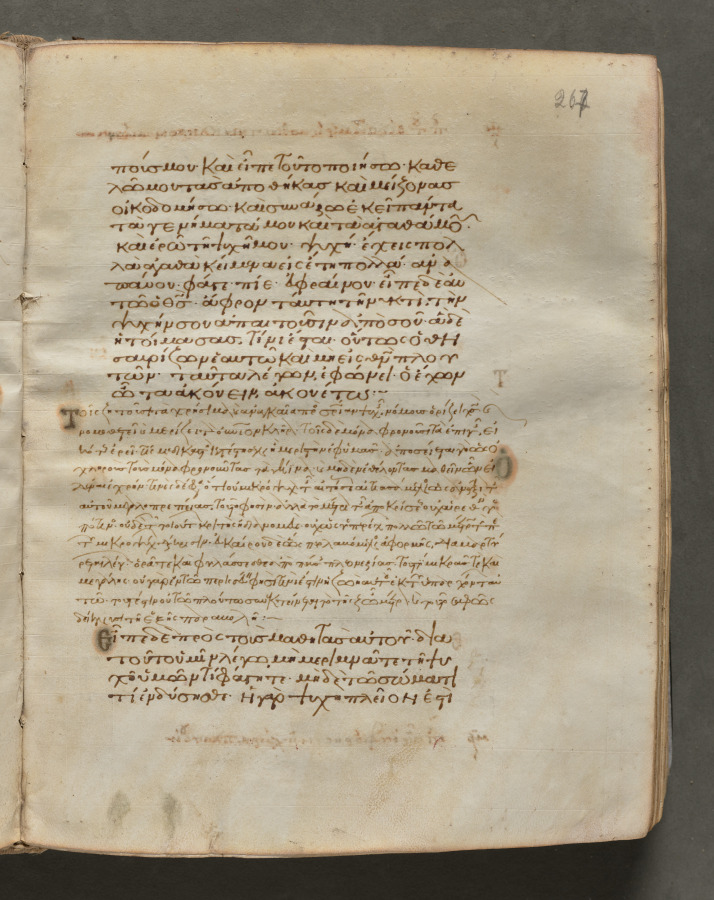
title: Text, folio 267 (recto), from a Gospel Book with Commentaries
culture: Byzantium, Constantinople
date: c. 1000–1100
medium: ink, tempera, and gold on vellum; leather binding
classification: Bound Volume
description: Each of the four gospels in this book opens on a page with brilliantly illuminated borders depicting the author of the text as well as birds—principally peacocks, symbols of the immortality of the soul—and fountains, representing the fountain of life and the salvation of the soul. This volume consists of 428 leaves with texts in Greek. Its level of sophistication suggests that it was probably written and decorated in a monastery in Constantinople.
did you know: Gospel books were carried in procession through Byzantine churches.